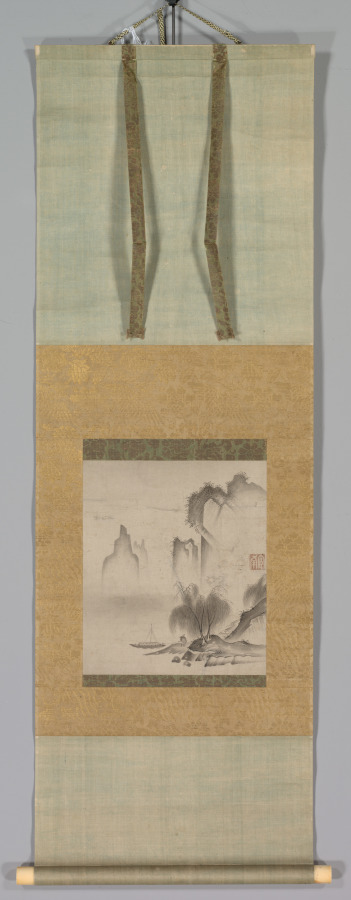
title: Figure Mooring a Boat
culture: Japan, Muromachi period (1392–1573)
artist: Kannan (Japanese, active mid-1500s)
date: mid-1500s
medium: hanging scroll, ink on paper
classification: Painting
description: Kannan is a little-known painter of the Kanto region. Close inspection of this quiet scene suggests that it represents the “night rain over Xiao and Xiang” scene from the Eight Views of the Xiao and Xiang Rivers. The style of the painting is similar to some works from Korea; as Japanese and Korean monk-painters traveled back and forth between one another’s monastic communities during the 1400s and 1500s, Kannan surely had the opportunity to consider incorporating Korean stylistic features into his work.